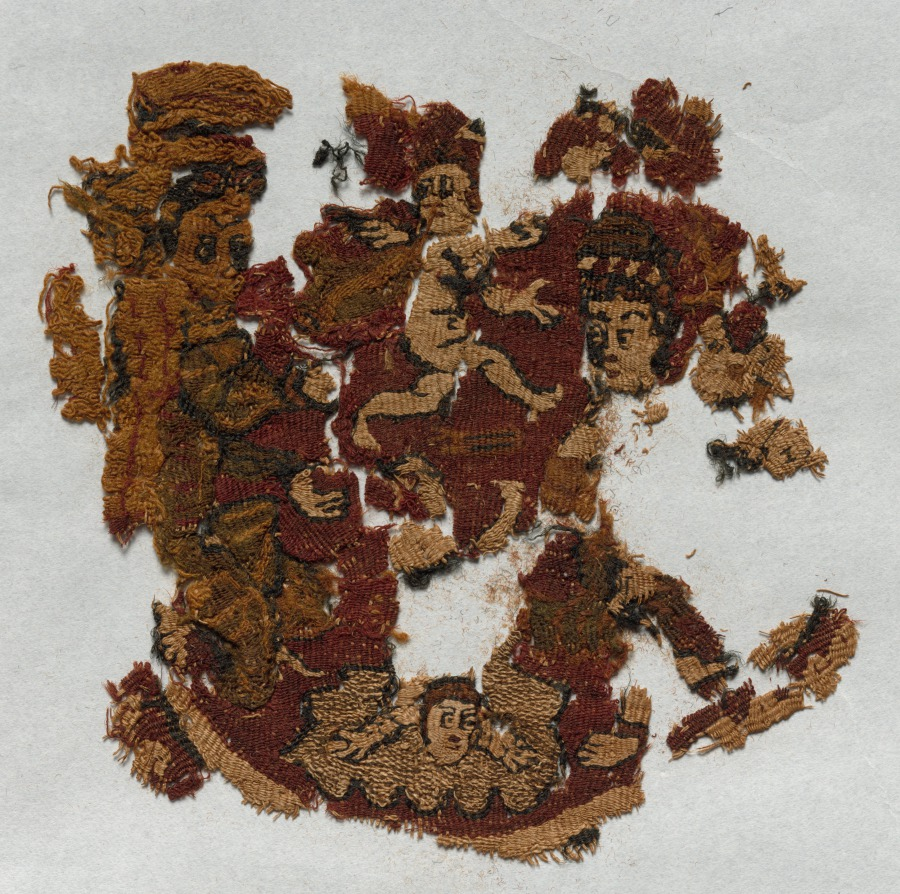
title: Fragment of a Segmentum: Achilles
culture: Egypt, Umayyad period (661–750)?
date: 650 – 750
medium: tapestry; linen and wool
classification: Textile